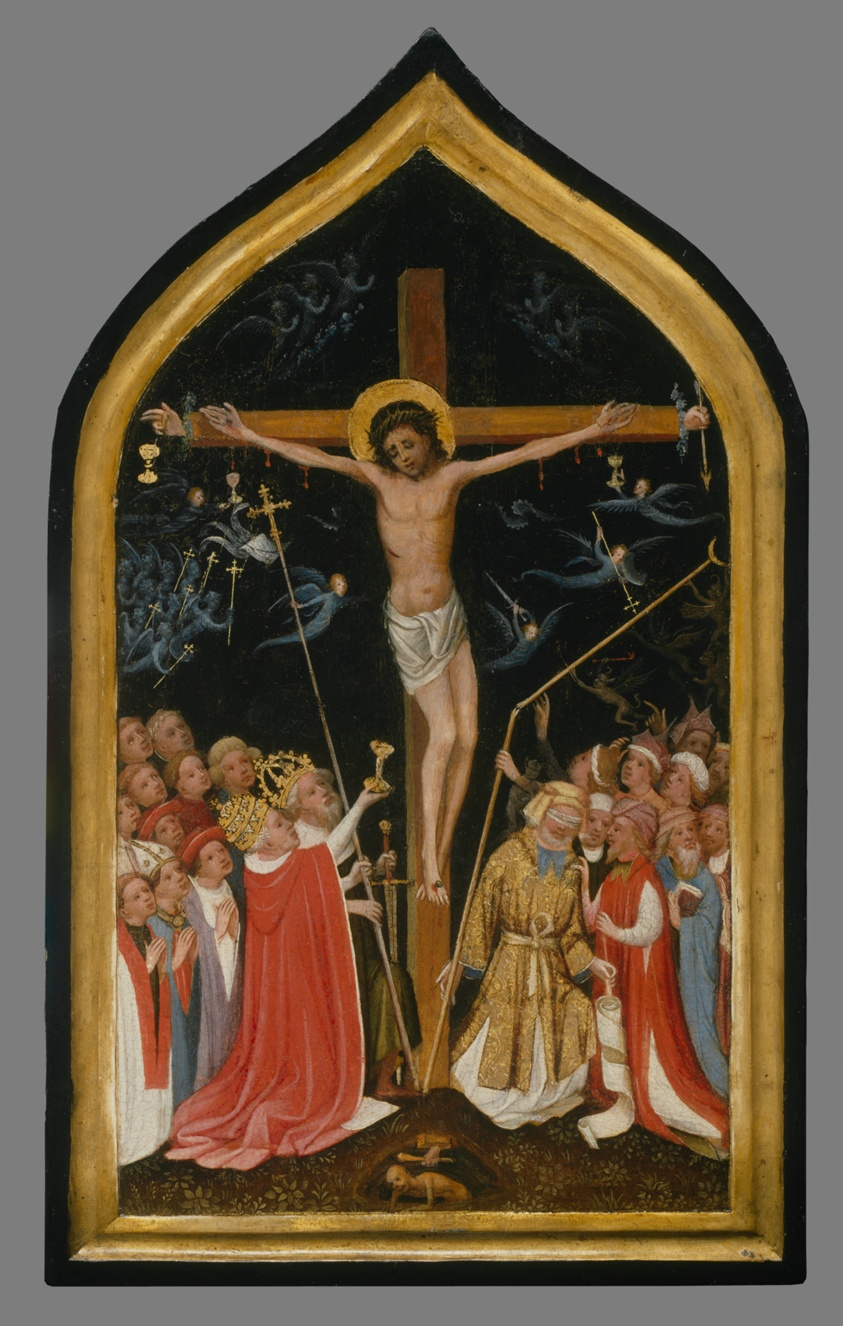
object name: Painting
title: Christ on the Living Cross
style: 15th century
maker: Follower of the Master of Saint Veronica (German, active c. 1395–1420)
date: c. 1420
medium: Oil on panel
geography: Germany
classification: painting; paint; oil paintings (visual works); oil on panel; german; european painting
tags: crucifixions, women, Virgin Mary, religious scenes, religious figures, religious, religion, night scenes, night, Mourning, men, kings, Jesus, death, cross, Christianity, Christian subjects, biblical, angels, scrolls (motifs), hands, staffs, swords, weapons, chalice, headdresses, crowns, devil/satan/lucifer/beezelbub/mephistopheles, Century of Progress, world's fairs, Chicago World's Fairs